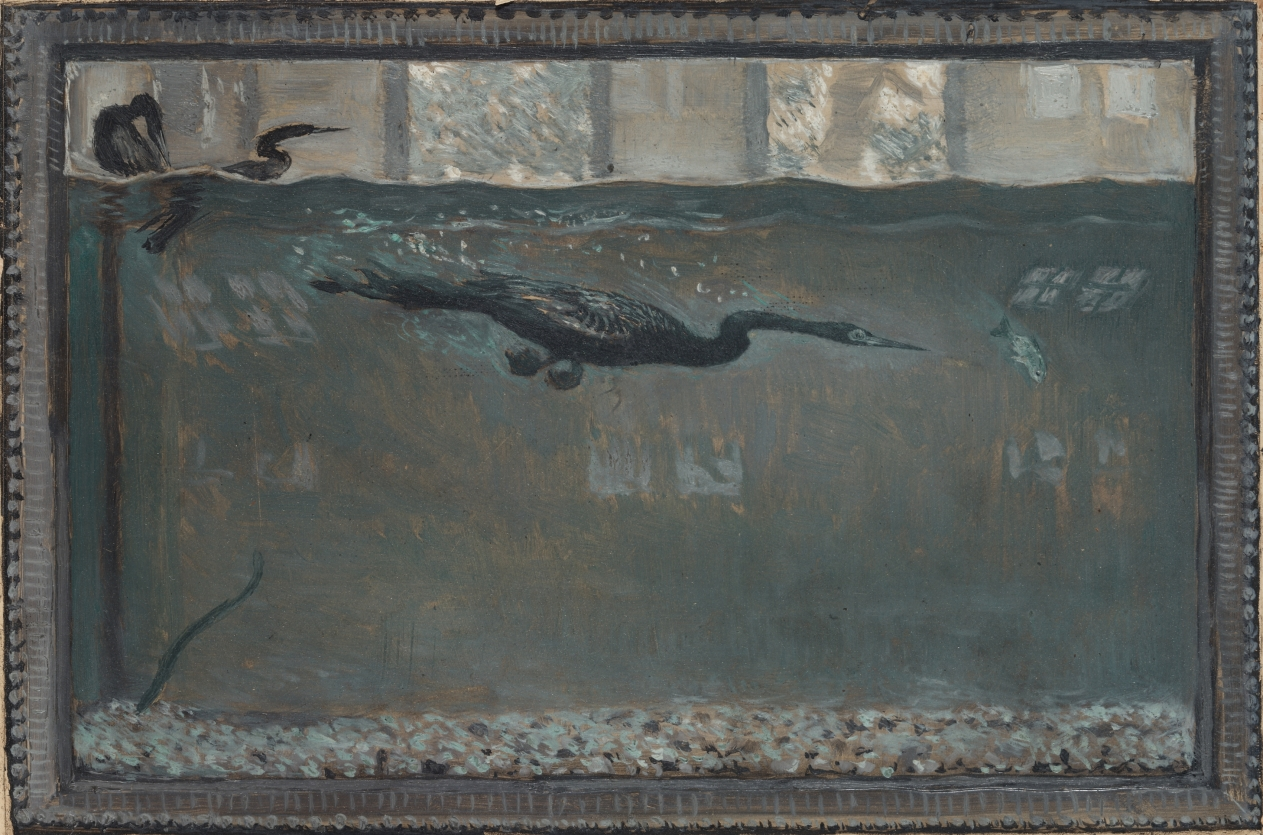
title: Diving Cormorant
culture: America, Ohio, Cleveland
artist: Otto H. Bacher (American, 1856–1909)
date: 1900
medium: oil on board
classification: Painting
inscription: signed lower left: Otto H. Bacher. 1900 [with remnants of a signature at lower right]